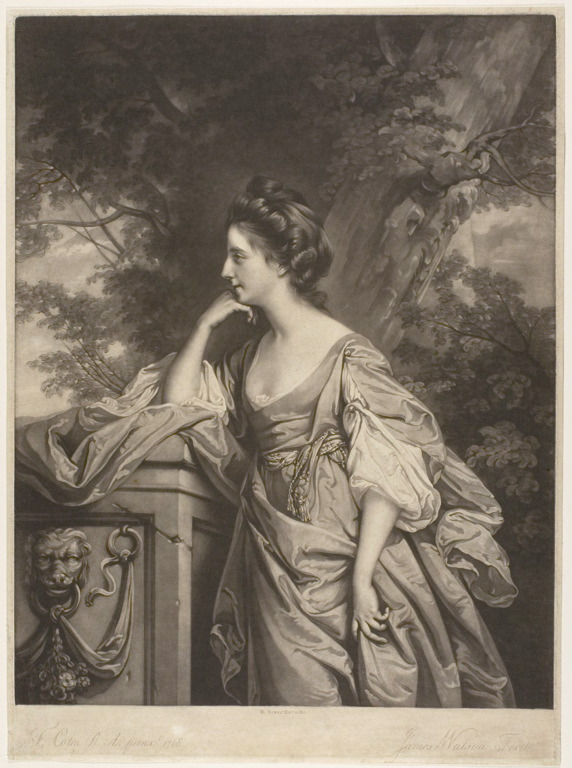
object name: Print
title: Frances, Lady Bridges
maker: James Watson (Irish, c. 1740-1790); after Francis Cotes (English, 1726-1770)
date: 1768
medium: Mezzotint on paper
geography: Ireland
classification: mezzotint; print; prints and drawing